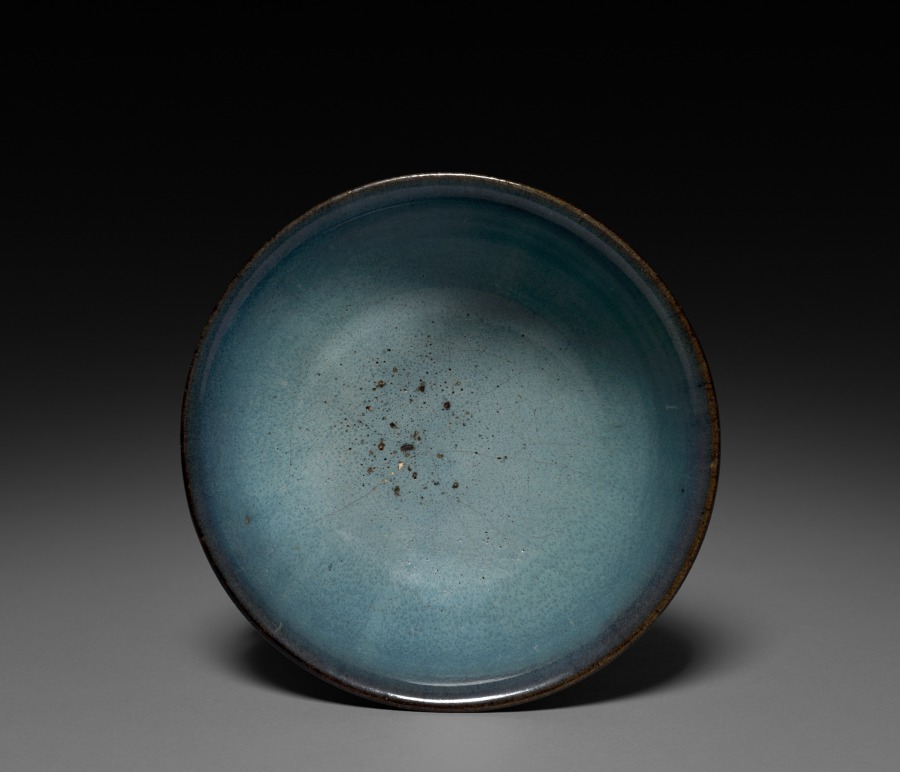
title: Bowl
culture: North China, Yuan dynasty (1271-1368) - Ming dynasty (1368-1644)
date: 1300s–1400s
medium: Glazed gray stoneware, Jun ware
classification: Ceramic